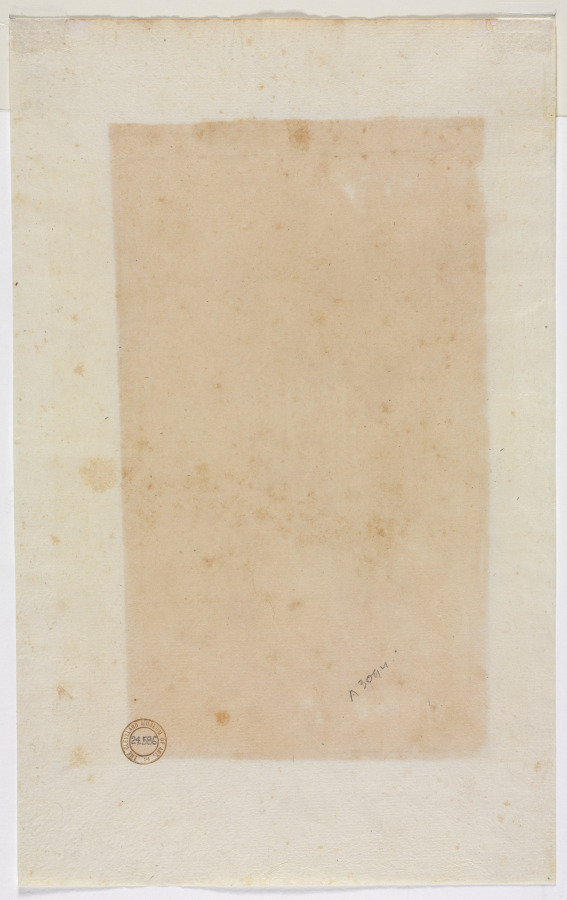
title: Border Lines (verso)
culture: Itay, 16th century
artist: Luzio Romano (Italian, active 1528–75)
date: mid 1500s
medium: pen and ink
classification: Drawing